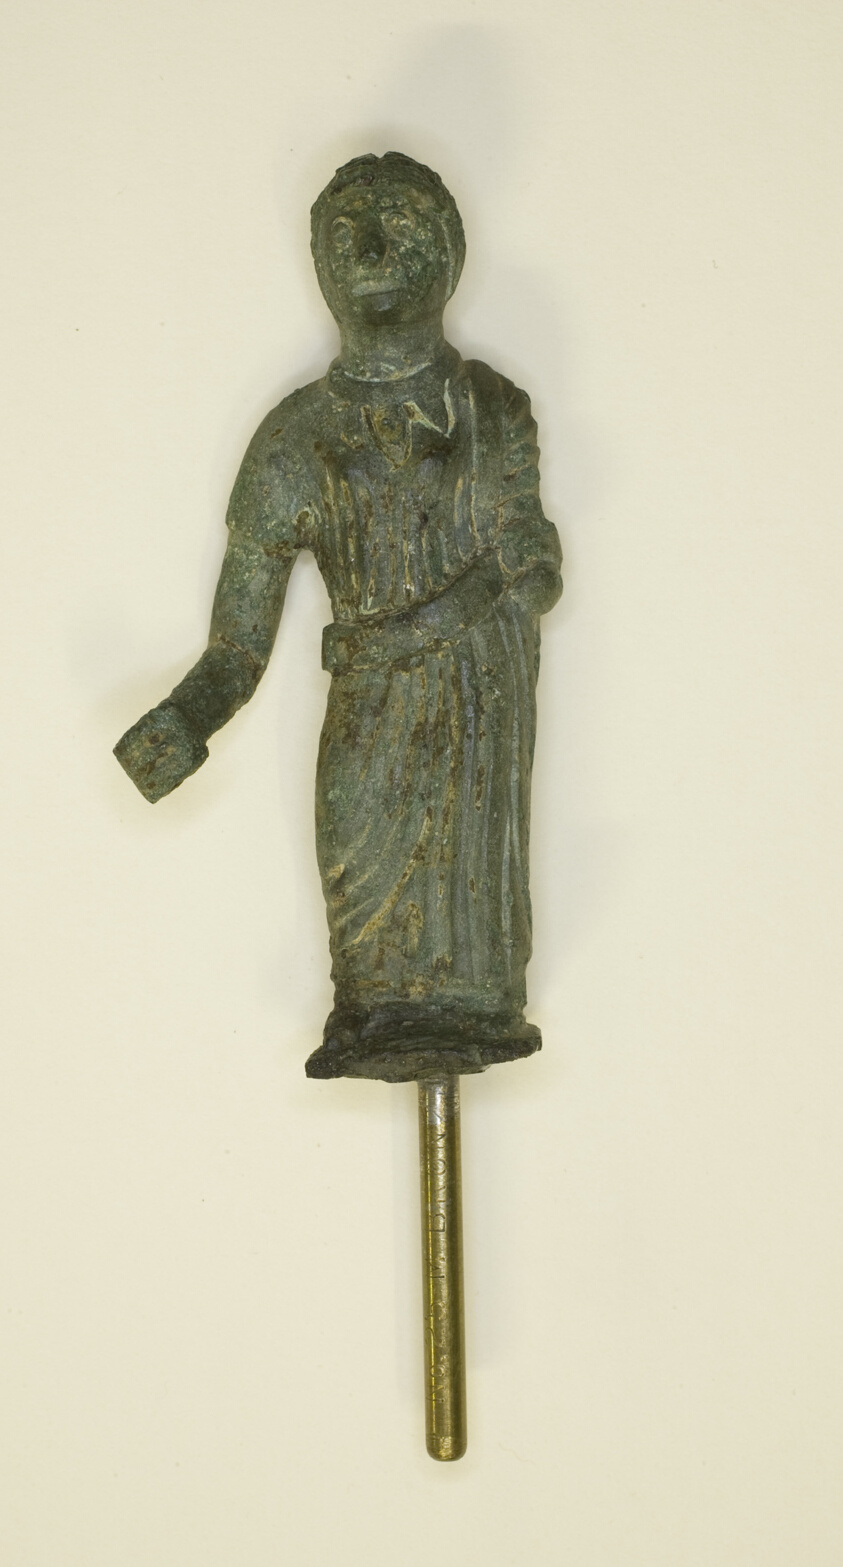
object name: Sculpture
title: Statuette of a Woman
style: etruscan, ancient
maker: Etruscan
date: 4th century BCE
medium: Bronze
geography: Etruria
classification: statuette; bronze; metal; sculpture; ancient art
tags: woman